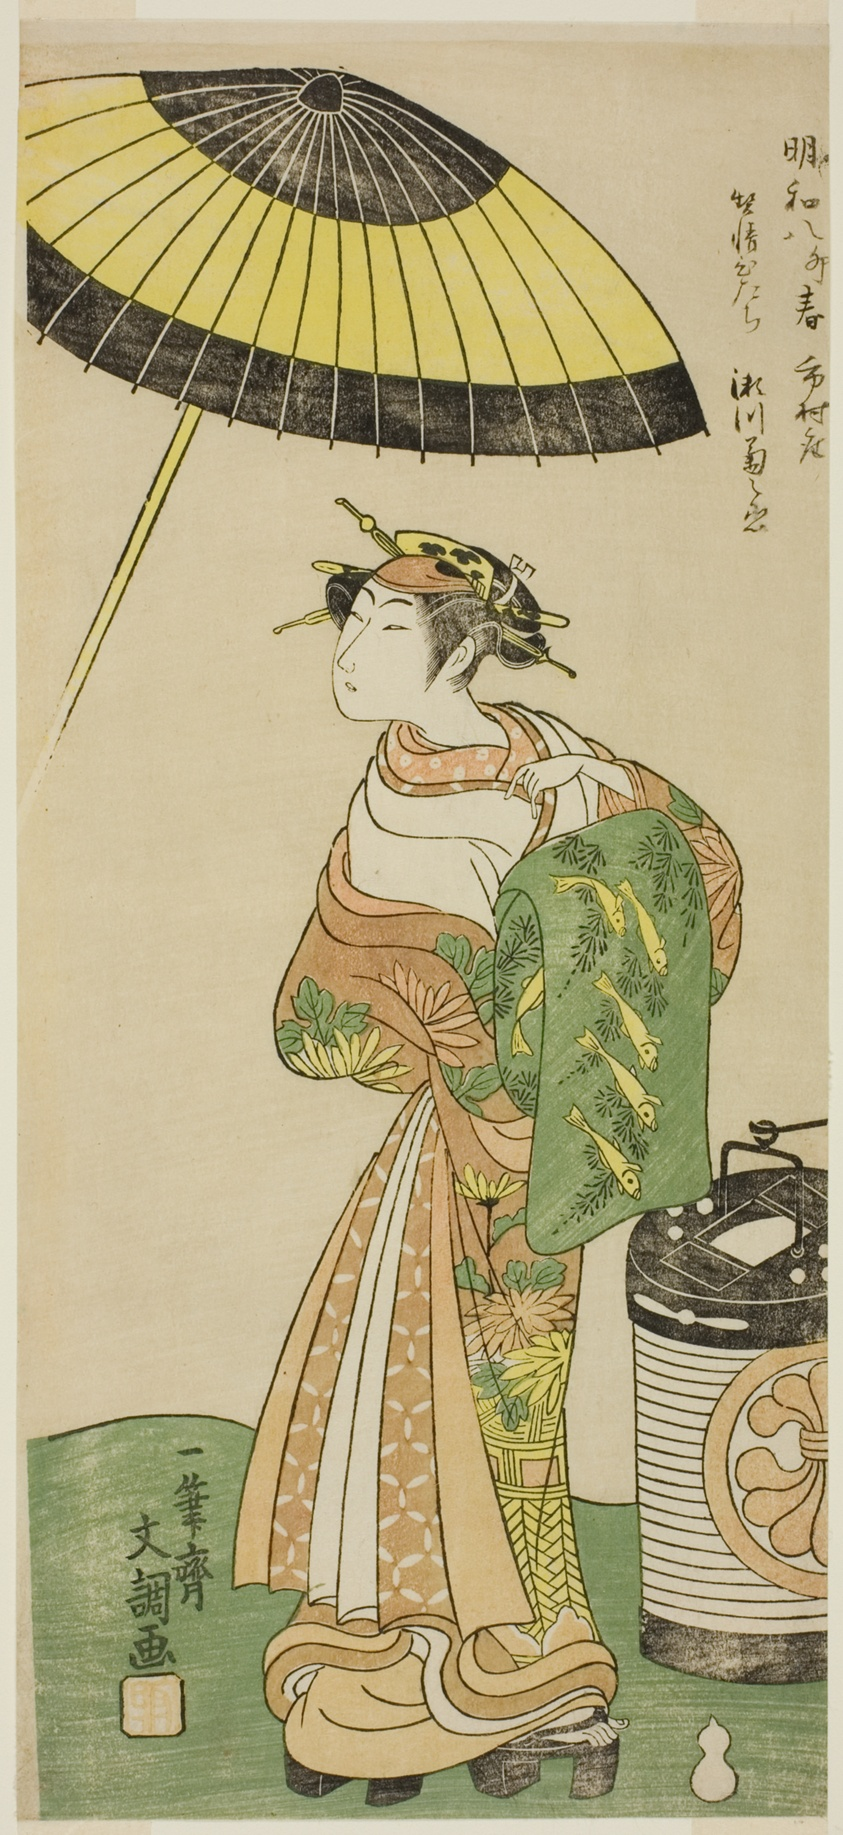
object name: Print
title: The Actor Segawa Kikunojo II as the Courtesan Hitachi in Part Two of the Play Wada Sakamori Osame no Mitsugumi (Wada's Carousal: The Last Drink With a Set of Three Cups), Performed at the Ichimura Theater from the Ninth Day of the Second Month, 1771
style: Japanese (culture or style)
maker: Ippitsusai Buncho (Japanese, active c. 1755-90)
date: c. 1771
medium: Color woodblock print; hosoban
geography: Japan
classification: woodblock print; print; asian art